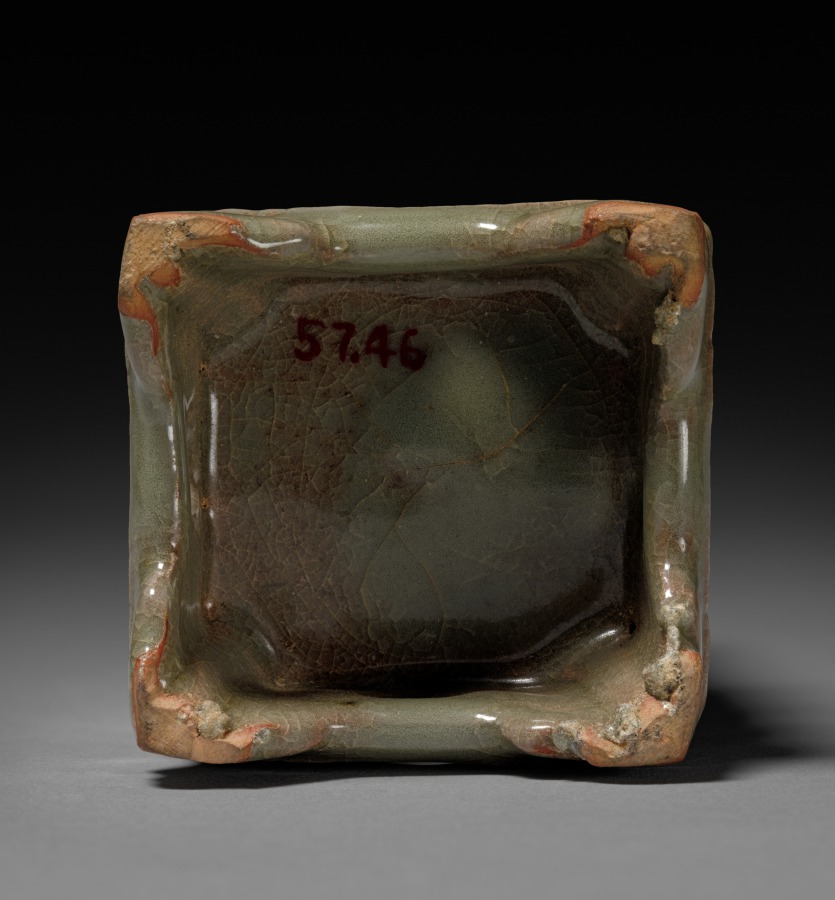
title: Vase in Shape of Cong: Southern Celadon Ware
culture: China, Zhejiang province, Yuan dynasty (1271-1368)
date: 1271–1368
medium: glazed buff stoneware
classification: Ceramic